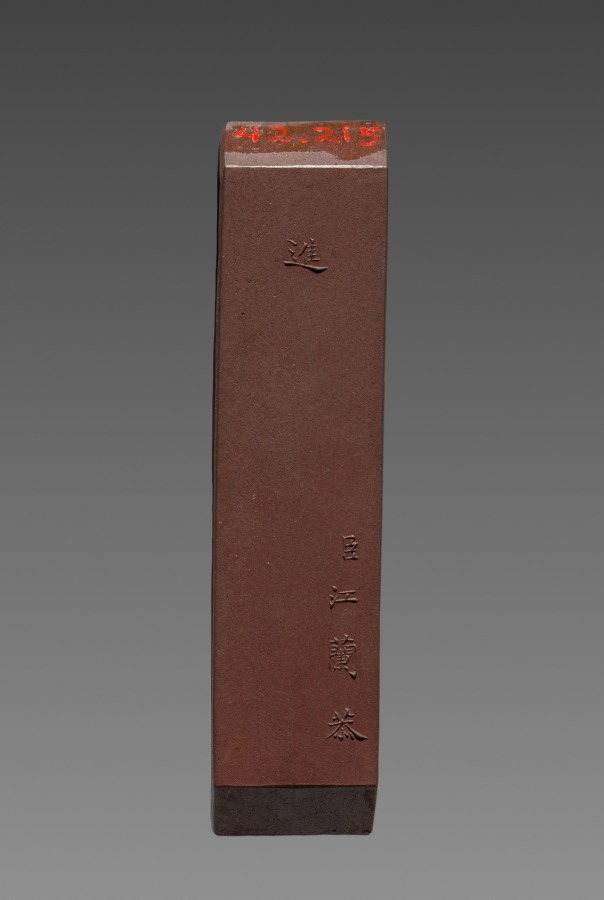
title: Ink Stick from an Imperially Commissioned Set of Ink Stick with Images and Poems of Famous West Lake Sites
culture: China, Qing dynasty (1644–1911), Qianlong reign (1736–95)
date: 1780–94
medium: Molded ink in brown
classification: Miscellaneous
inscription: 乾隆年製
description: This is one of ten ink cakes of different shapes and colors stored in an exquisite lacquer box. Each is inscribed in gold with a poem by the Qianlong emperor, praising the ten famous sights of the Westlake in Hangzhou, near Shanghai. The Westlake is famous for its natural beauty; it was a favorite imperial destination and remains a tourist attraction today. Ink cakes (also called ink sticks) are dissolved with the addition of water and ground on the surface of a flat stone into liquid ink for painting and calligraphy. The precious ink cakes here, however, have never been used.